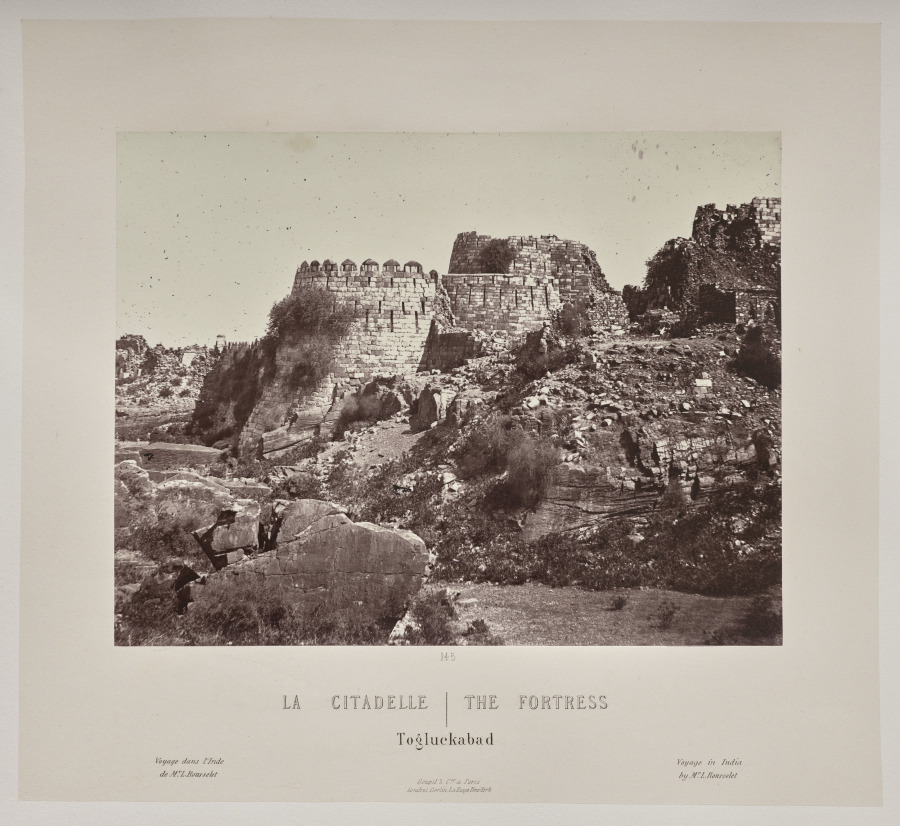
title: The Fortress, Togluckabad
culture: France, 19th century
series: India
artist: Louis-Théophile Marie Rousselet (French, 1845–1929)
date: 1865–68, published 1869–70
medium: Albumen print from glass plate negative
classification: Photograph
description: Concerned that his drawings did not do justice to the splendor of India’s monuments, Rousselet learned photography in India that year, a remarkable accomplishment. He proved to be a talented photographer with a sophisticated sense of composition. The scenes in this volume sweep across sites of Sultanate, Rajput, and Mughal power in northern India, from the sacred Hindu city of Varanasi on the Ganges River to Alwar in Rajasthan. Also included are several scenes of industry and portraits of Indian rulers.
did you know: Louis Rousselet described himself as a “scientific traveler” when he went to India alone at age 18 in 1863 and stayed into 1868.